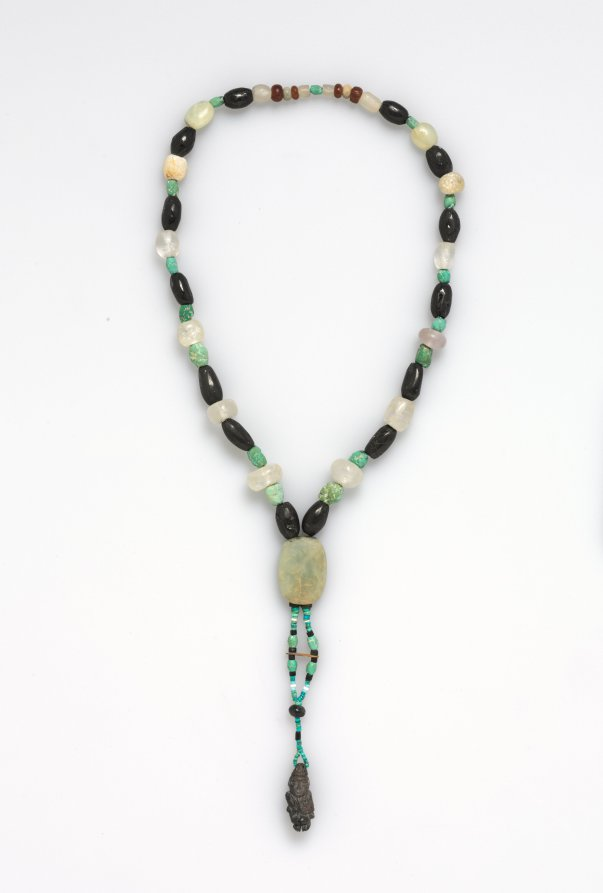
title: Necklace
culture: Peru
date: before 1532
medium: polished stone beads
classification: Jewelry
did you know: These ancient beads were restrung in modern times.